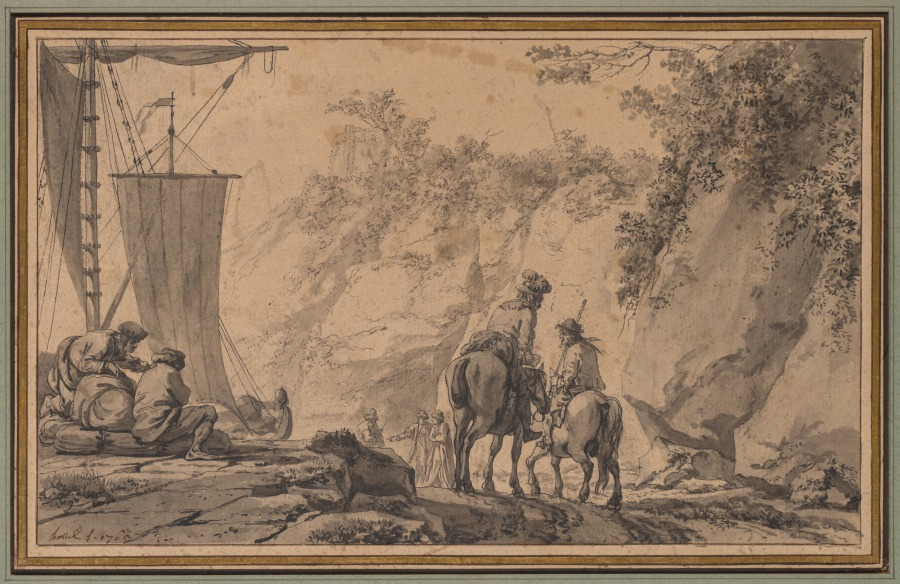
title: Figures in a Landscape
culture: France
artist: Jean-Pierre-Louis-Laurent Hoüel (French, 1735–1813)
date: 1763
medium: Black ink and gray wash; framing lines in brown ink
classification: Drawing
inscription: signed and dated, lower left corner, in brown ink: hoüel f. 1763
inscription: mount: lower right, blind stamp, Jean Baptiste Glomy (L.1085)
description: Hoüel’s oeuvre is dominated by images of landscapes in varied media. This ink and wash drawing portrays a scene of ordinary life in a verdant, mountainous environment. In the foreground, two men on horseback converse while others rest on a rock. On the left, the sail and rigging of a boat stalled in the harbor are visible.